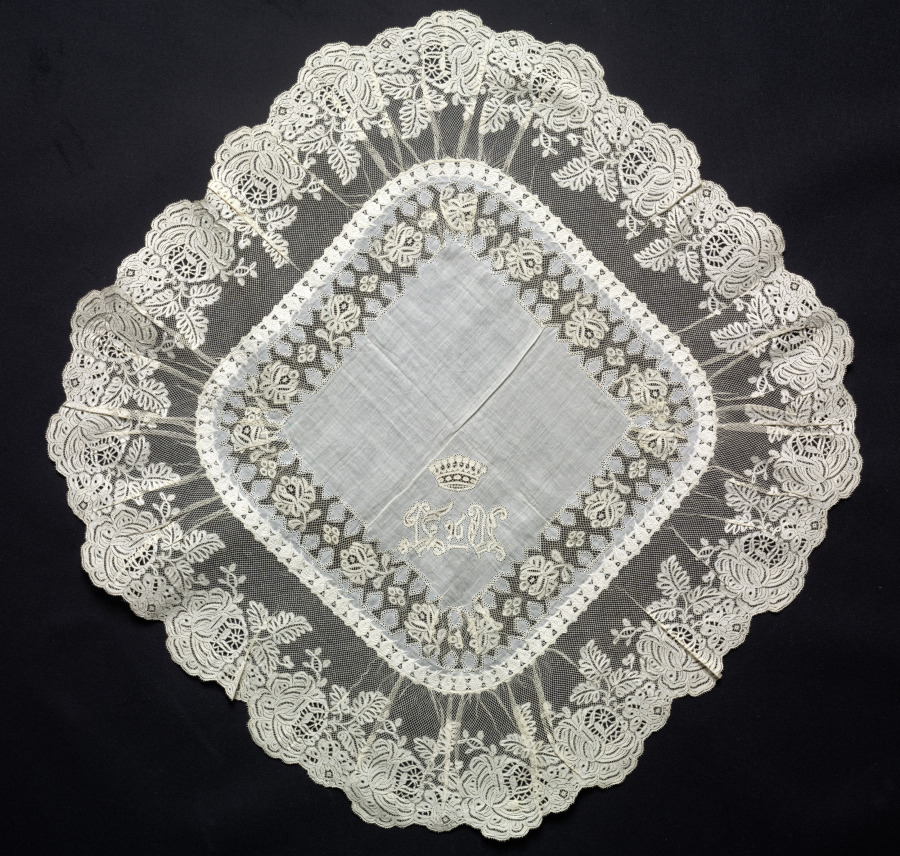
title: Lace Handkerchief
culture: France or Flanders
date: 1800s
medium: Plain weave linen center: bobbin lace (Valenciennes) insertion and embroidered border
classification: Lace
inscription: "V de L."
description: In the lower corner of this lace handkerchief, the letters "V" and "L" with a nine-point coronet above them, have been created in lace and inset into the plain weave linen.